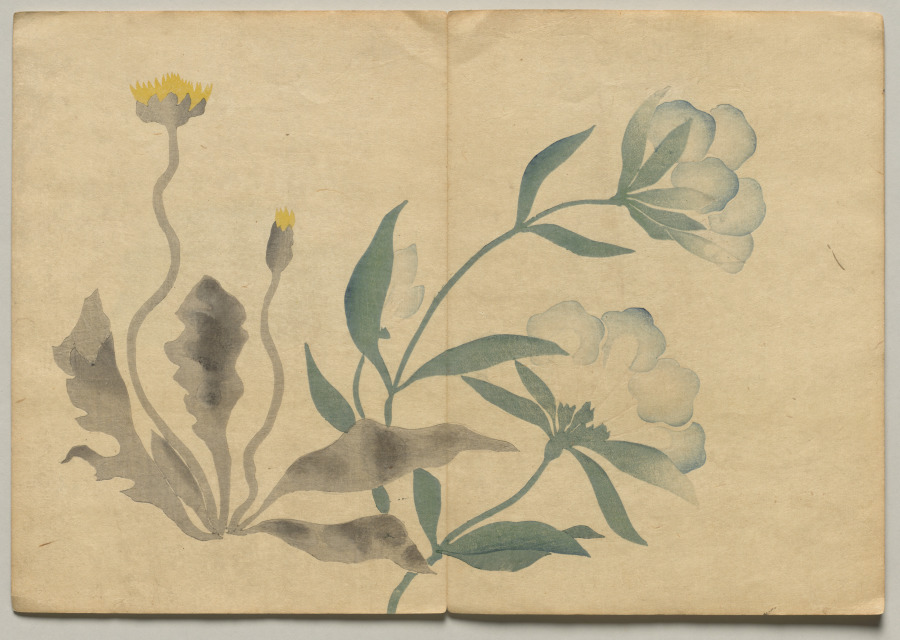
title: Scene from The Kōrin Picture Book (Volume 2)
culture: Japan, Edo period (1615–1868)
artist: Nakamura Hōchū (Japanese, d. 1819)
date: 1800s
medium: color woodblock printed book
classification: Bound Volume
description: Ogata Korin (1658-1716) was one of the most admired artists of Rimpa, or "decorative school painting." These books by the charming later-generation Rimpa artist Hochu record Korin's inventive designs.